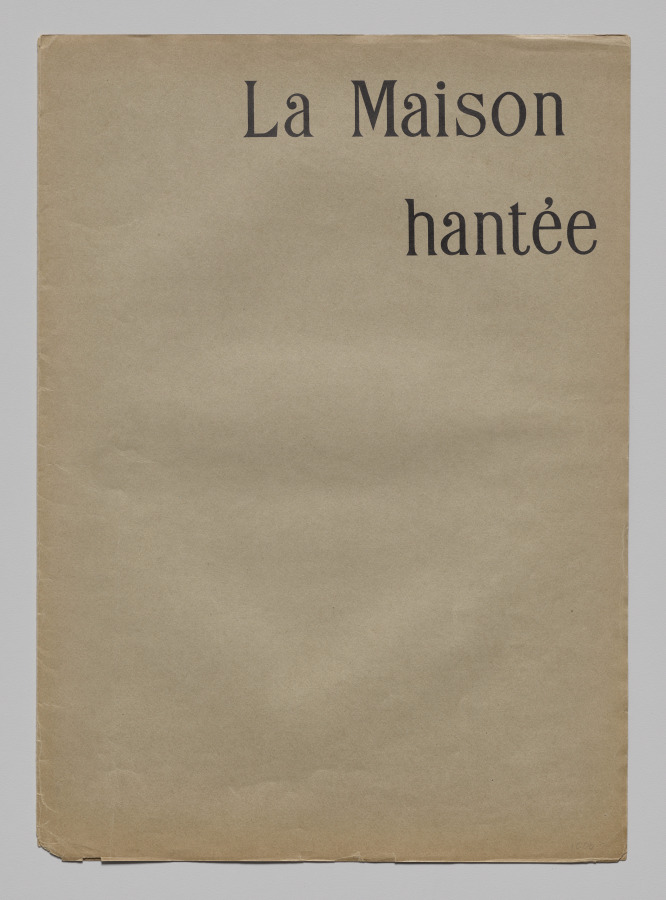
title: Cover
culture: France, late 19th Century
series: The Haunted House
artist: Odilon Redon (French, 1840–1916)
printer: Auguste Clot (French, 1858–1936)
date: 1896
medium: lithograph on wove paper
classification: Print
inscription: printed, from top center: Texte de BULWER-LYTTON / LA MAISON HANTÉE / Traduction RENÉ PHILIPON / 6 Lithographies à 60 Exemplaires / ODILON REDON / 1896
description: Odilon Redon was a voracious reader of contemporary literature, and such texts often influenced his art. This series was inspired by The Haunted and the Haunters, an 1859 novel by British writer Edward Bulwer-Lytton. Redon’s prints capture the book’s mysterious tone and emphasis on the supernatural through vague but evocative imagery that sometimes borders on abstraction. By this time a seasoned expert in lithography, the artist collaborated with master printer Auguste Clot. Their combined technical skills allowed for the rich tonal variation seen here, made by turning Redon’s lithographic crayon on its side, layering various marks, and even scratching directly into the surface of his stone.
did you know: One of Redon's greatest patrons, the occultist René Philipon, commissioned this portfolio as a supplement for his French translation of Bulwer-Lytton's The Haunted and the Haunters.